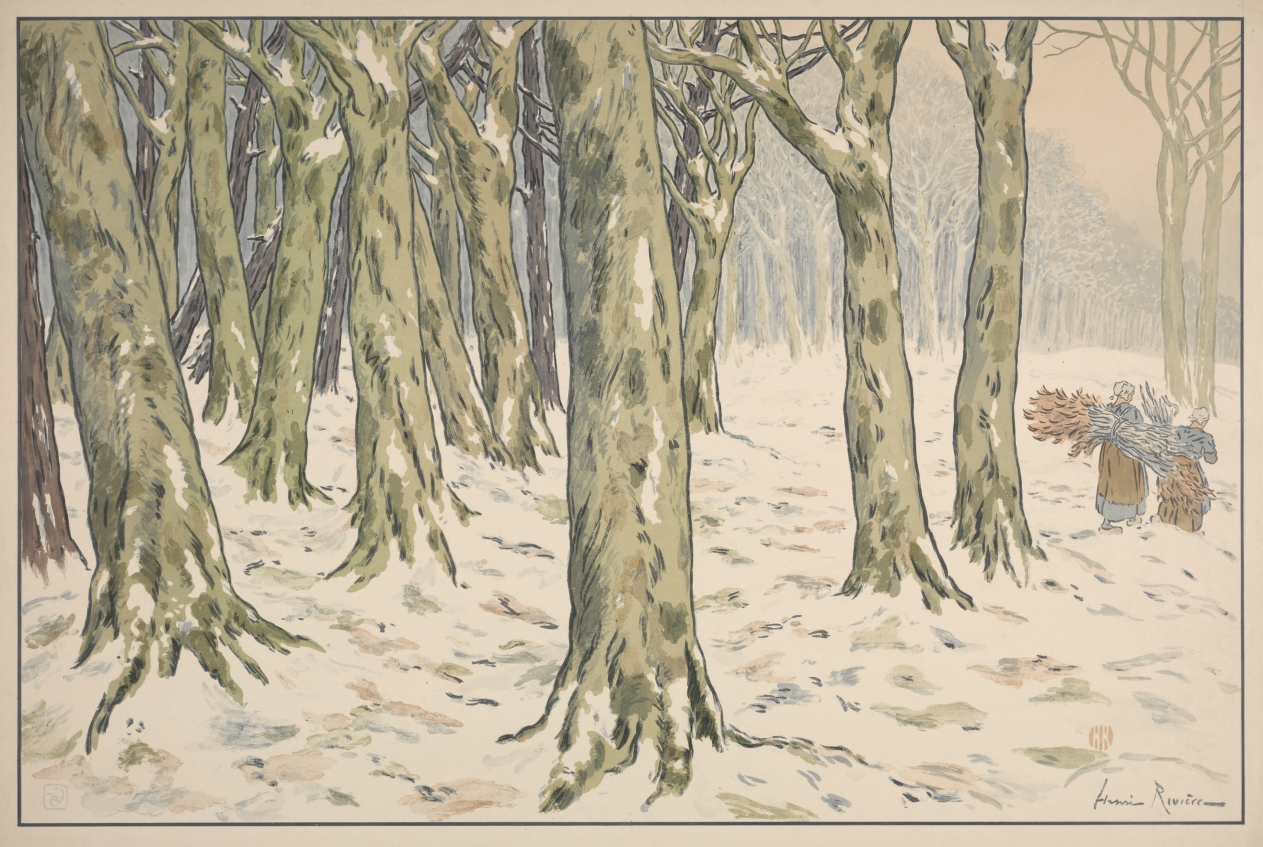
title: The Woods, Winter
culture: France, 19th century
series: Aspects of Nature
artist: Henri Rivière (French, 1864–1951)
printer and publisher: Eugene Verneau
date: 1898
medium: color lithograph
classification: Print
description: Prints were typically collected and kept in portfolios, but around 1891 some artists began to produce large color lithographs to be framed and hung indoors. Beginning in 1896, Henri Rivière designed 12 compositions titled Aspects of Nature, meant to be hung in vestibules, dining rooms, children’s bedrooms, or in schools to enliven classrooms and cultivate the students’ love for nature.